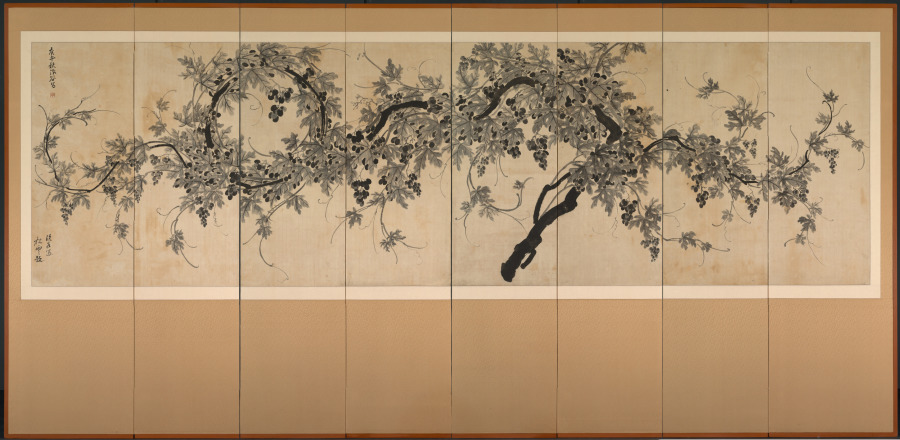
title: Grapevine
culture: Korea, Joseon dynasty (1392–1910)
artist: Choe Seok-hwan (Korean, active first half of 19th century)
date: early 1800s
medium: eight-panel folding screen; ink on paper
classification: Painting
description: July is the season of the ripening deep blue grapes, and also the month when the monsoon season begins in Korea. To the accompaniment of stormy summer wind, grape vines make a spectacular full circle across the surface of this eight-panel folding screen. The artist employed a variety of ink tones to create a sense of swift movement of grapevines amid turbulent storms. Since their first introduction to the Korean peninsula around the 7th century through the Silk Road, grapes were used as artistic motifs. Artists embellished the surface of mother-of-pearl lacquer boxes or blue-and-white porcelain, while scholar-poets composed poems about the luscious sweet sourness of green grapes. By the late 19th century, grapes became the icon of fertility: the fruit grows in large clusters of many individual grapes, evoking the image of a stable clan with many descendants.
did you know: Grapes in premodern East Asia symbolize many children.